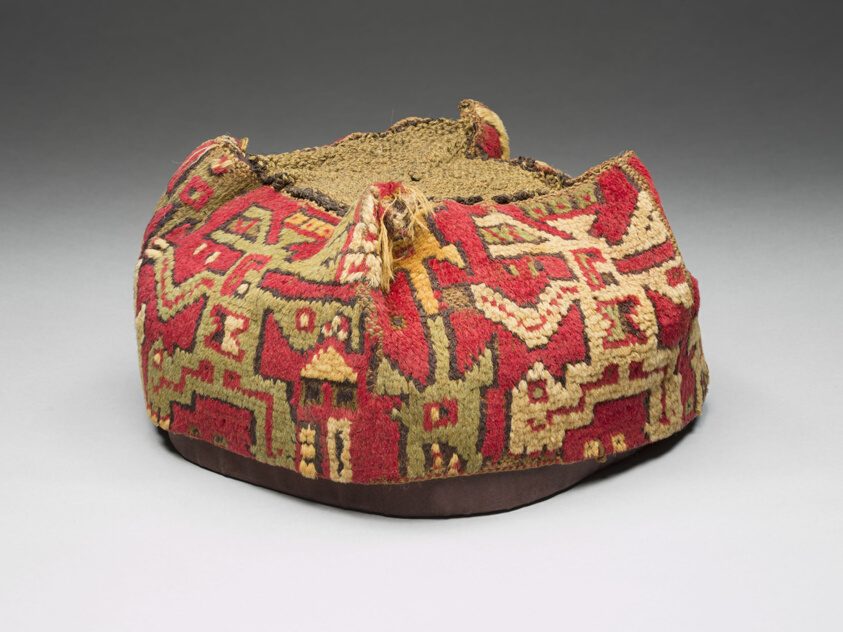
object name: Costume and Accessories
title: Hat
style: huari, early intermediate period, Pre-Columbian, americas, andes, andean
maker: Wari (Peru, Probably central or south coast)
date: A.D. 600/900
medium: Wool (camelid), square knotted ground with interworked yarns forming cut pile; tassels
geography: Peru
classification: textile; needlework (visual works); costume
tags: costume, figures (representations)